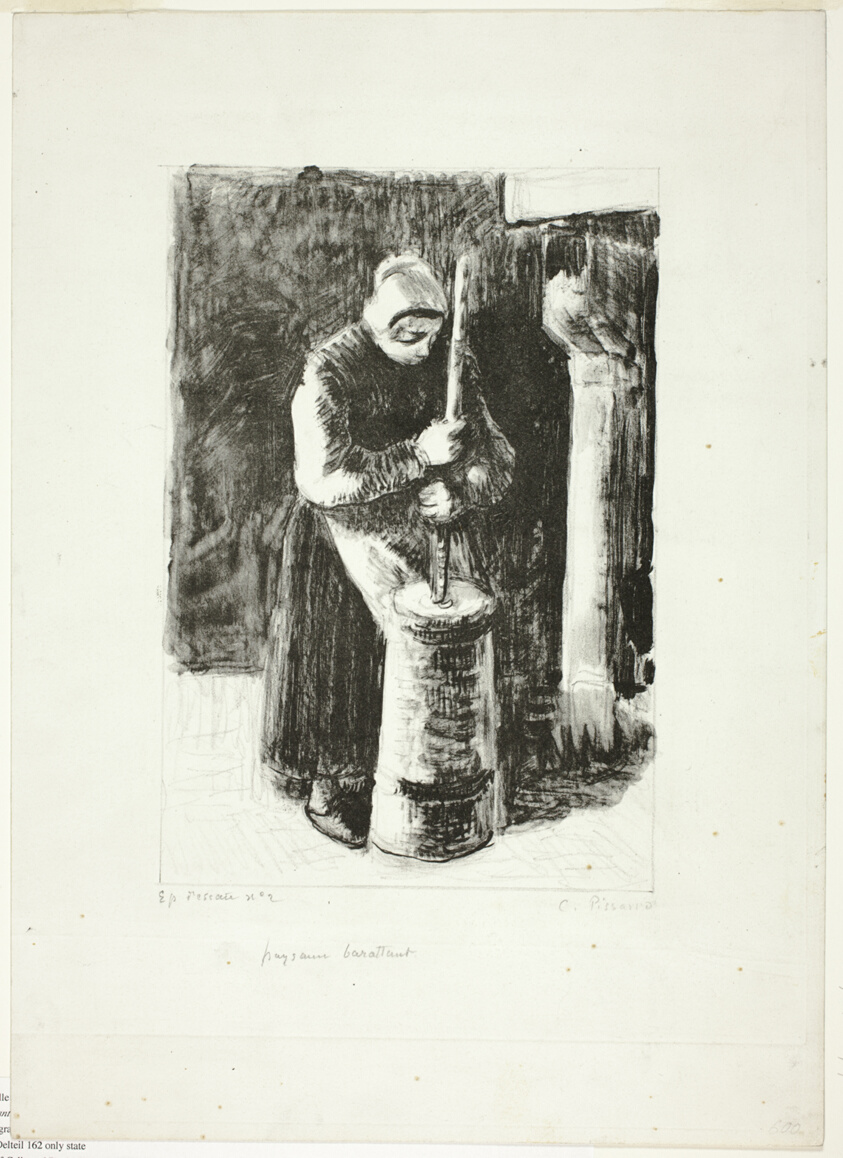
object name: Print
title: Peasant Woman Churning Milk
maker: Camille Pissarro (French, 1830-1903)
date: c. 1896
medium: Lithograph in black on off-white wove paper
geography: France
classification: lithograph; print; prints and drawing